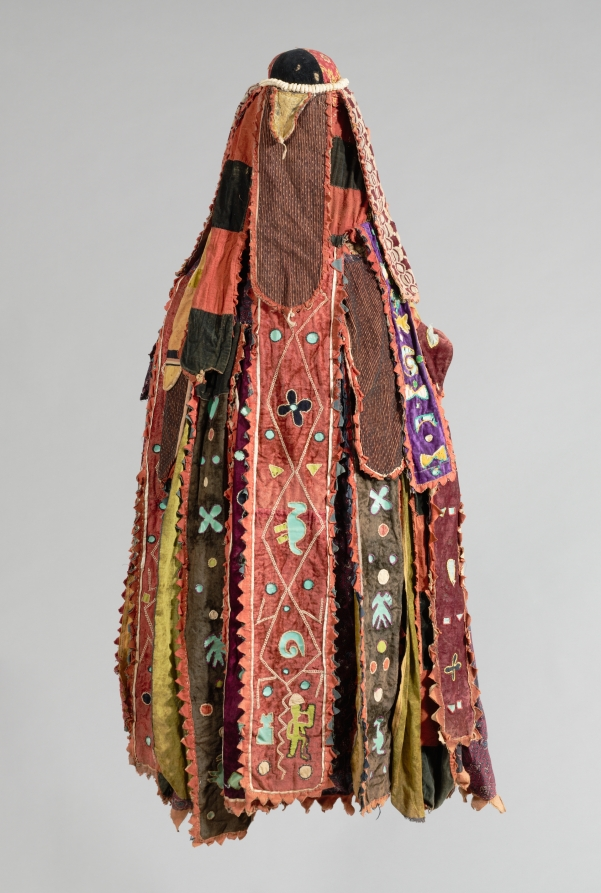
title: Egúngún Masquerade Dance Costume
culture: Africa, West Africa, Nigeria, Yorùbá-style maker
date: 1900s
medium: cotton, velvet, flannel, leather, dye, probably wood, cowrie shells, metal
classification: Mask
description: Swirling into motion, egúngún masquerade costumes appear during annual festivities to bless the community. Manifesting ancestral spirits, they serve as a bridge between the living and the otherworld. The fabric panels create a dwelling place for ancestral spirits. Arranged and selected according to Yorùbá design sense (ojú-ọnà), this mask incorporates hundreds of African, Asian, and European fabrics. These include imported damasks, velvets, faux furs, and embroideries, as well as local indigo-dyed cottons.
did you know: This masquerade costume is made from both imported and locally made fabrics.